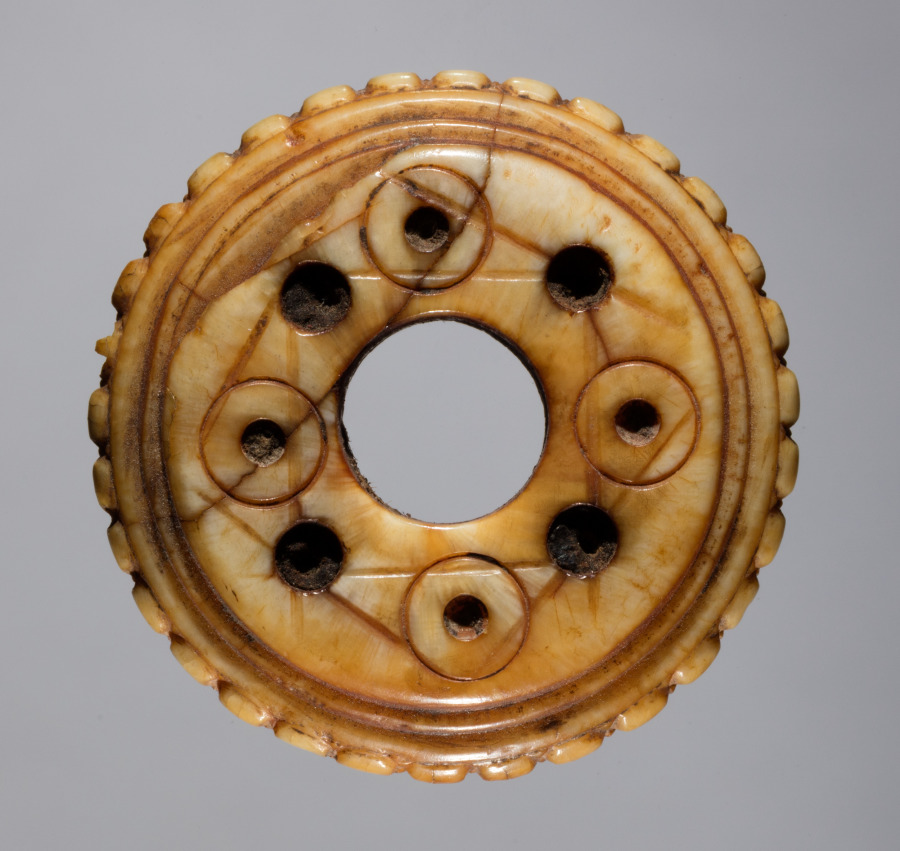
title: Spindle Whorl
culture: Iran, early Islamic period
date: 700s - 900s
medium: bone, incised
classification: Spindle Whorl